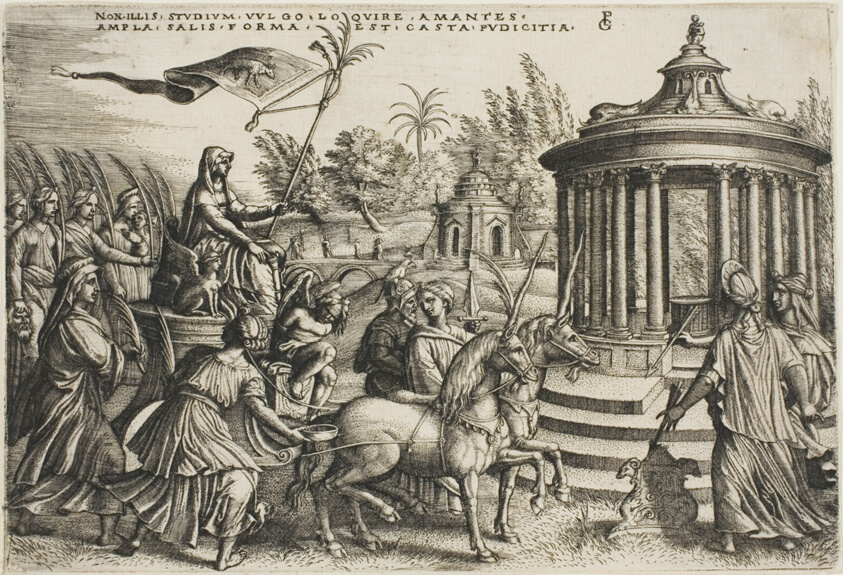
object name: Print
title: The Triumph of Chastity, plate two from The Triumphs of Petrarch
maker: Georg Pencz (German, c. 1500-1550)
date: c. 1539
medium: Engraving in black on ivory laid paper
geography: Germany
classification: engraving; print; prints and drawing